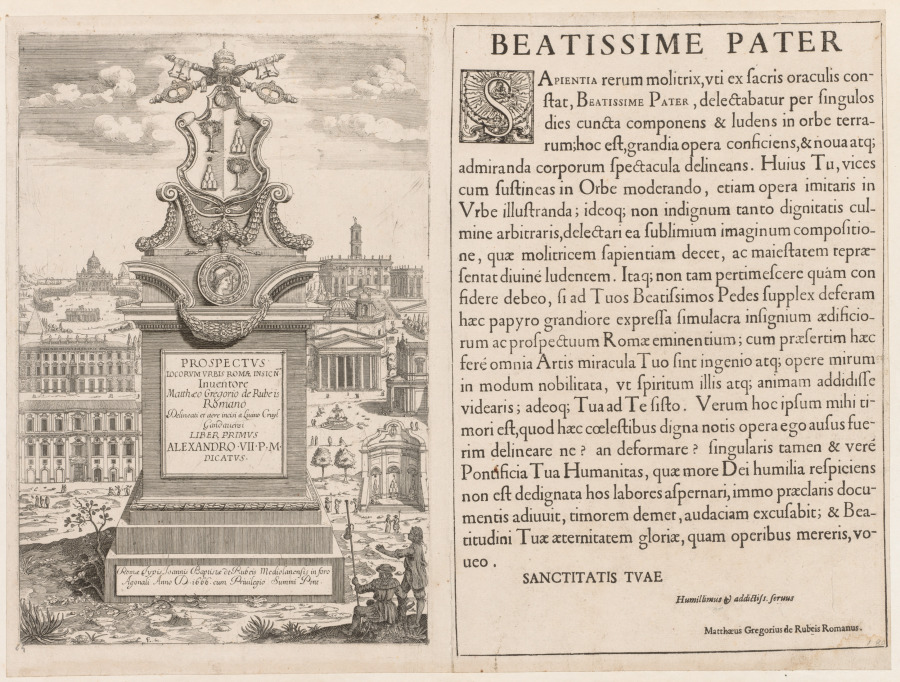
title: Frontispiece from "Prospectus Locurum Urbis Romae Insign[ium]"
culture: Flanders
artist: Lievin Cruyl (Flemish, c. 1640-c. 1720)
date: 1666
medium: etching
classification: Print